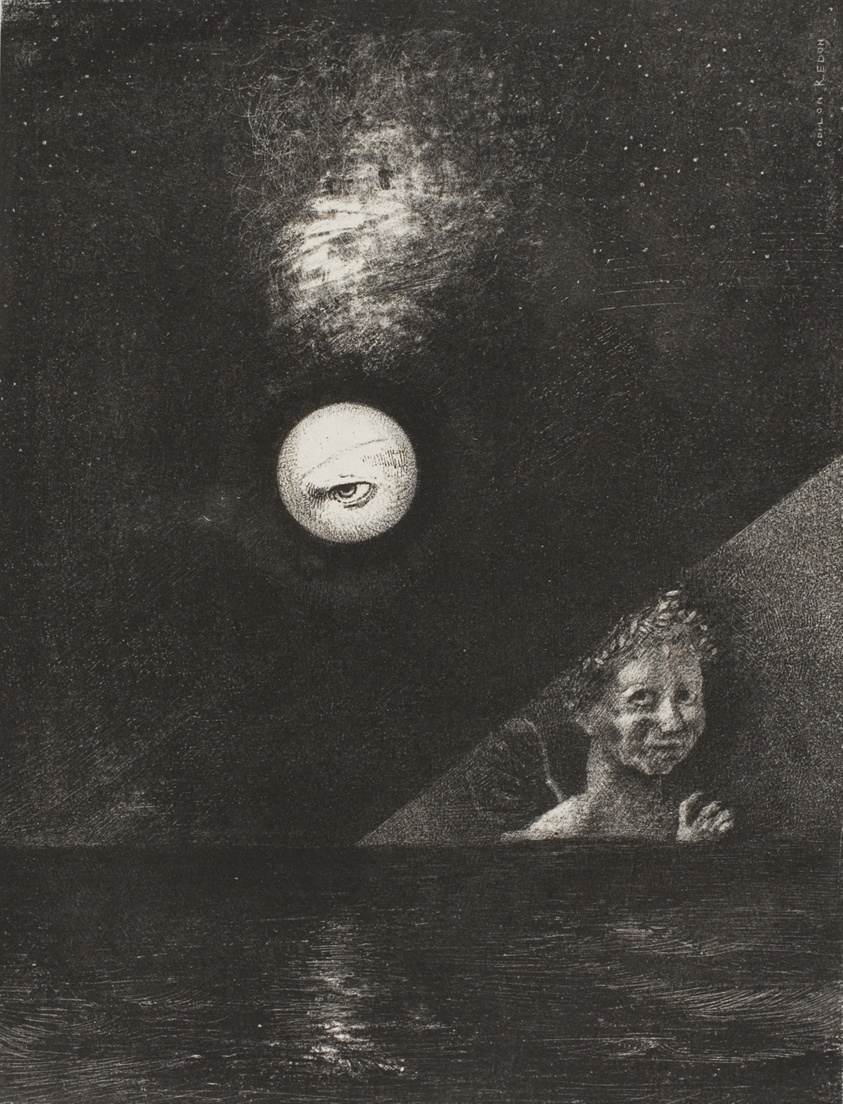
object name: Print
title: On the Horizon the Angel of Certitude, and in the Somber Heaven a Questioning Eye, plate four from To Edgar Poe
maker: Odilon Redon (French, 1840-1916)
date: 1882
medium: Lithograph in black on ivory China paper, laid down on white wove paper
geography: France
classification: lithograph; print; prints and drawing; paper